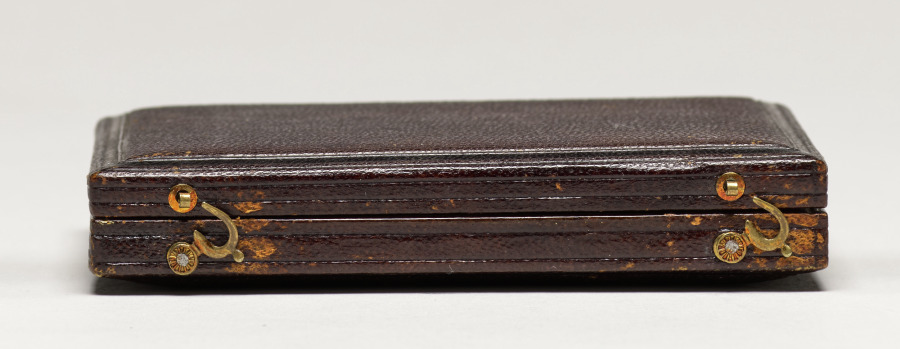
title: Alice Montgomery (1850-1917)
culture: America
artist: Enoch Long (American, 1823–1898)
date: 1850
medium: daguerreotype, applied color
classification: Photograph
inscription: Written in black ink on enclosed paper: "Alice Montgomery / 1850-1917"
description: Children have always been particularly cherished subjects for photography. Portraits were made to preserve the memory of their stages of growth and, in an age when long-distance travel was rare, to share with faraway relatives. And, for a sadder reason: in 1840 an estimated one-third of children died before age five. Photography offered grieving parents the opportunity to immortalize their children’s features. This tragic genre of photographs, later called “post-mortems,” often depicts the children in fine clothing, laying down with eyes shut, as if merely napping.